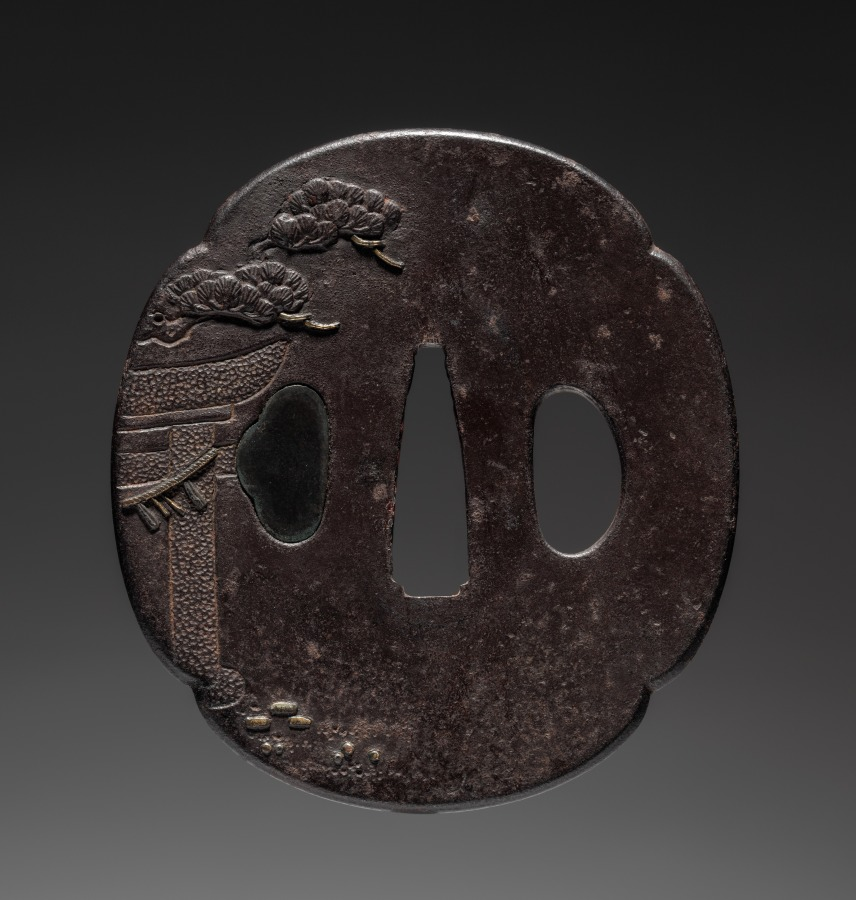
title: Sword Guard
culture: Japan, Edo period (1615–1868)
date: 1615–1868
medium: iron, gold, and mother-of-pearl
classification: Arms and Armor